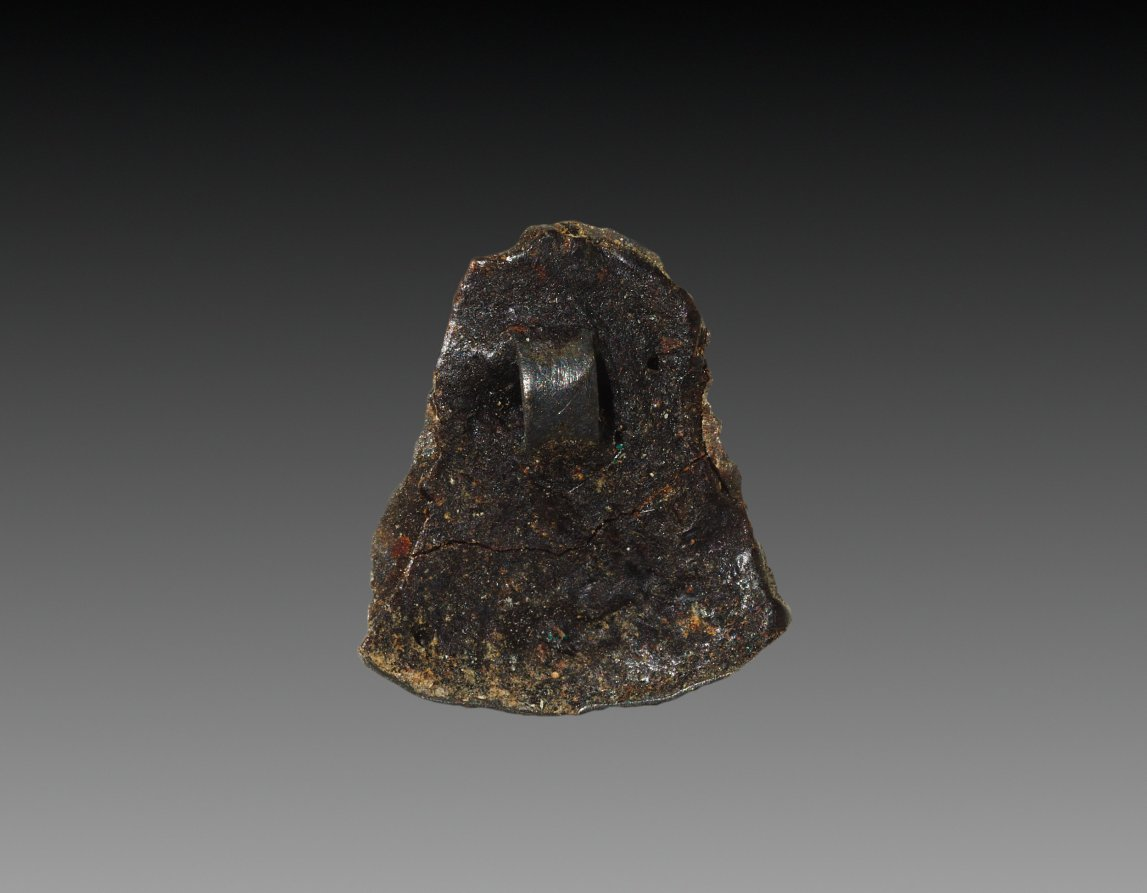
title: Rosette for Wig Decoration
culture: Egypt, Middle Kingdom (2040–1648 BCE), Dynasty 12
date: 1980–1801 BCE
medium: silver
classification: Jewelry